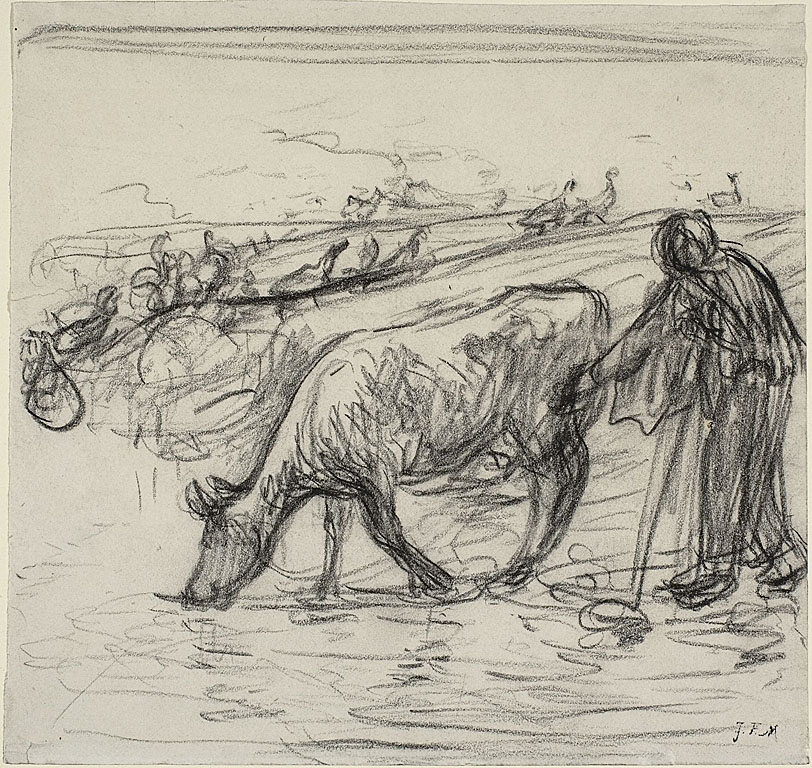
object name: Drawing and Watercolor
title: Peasant Watering Her Cow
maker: Jean François Millet (French, 1814-1875)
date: 1871/1873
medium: Charcoal on ivory wove paper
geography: France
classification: drawings (visual works); prints and drawing